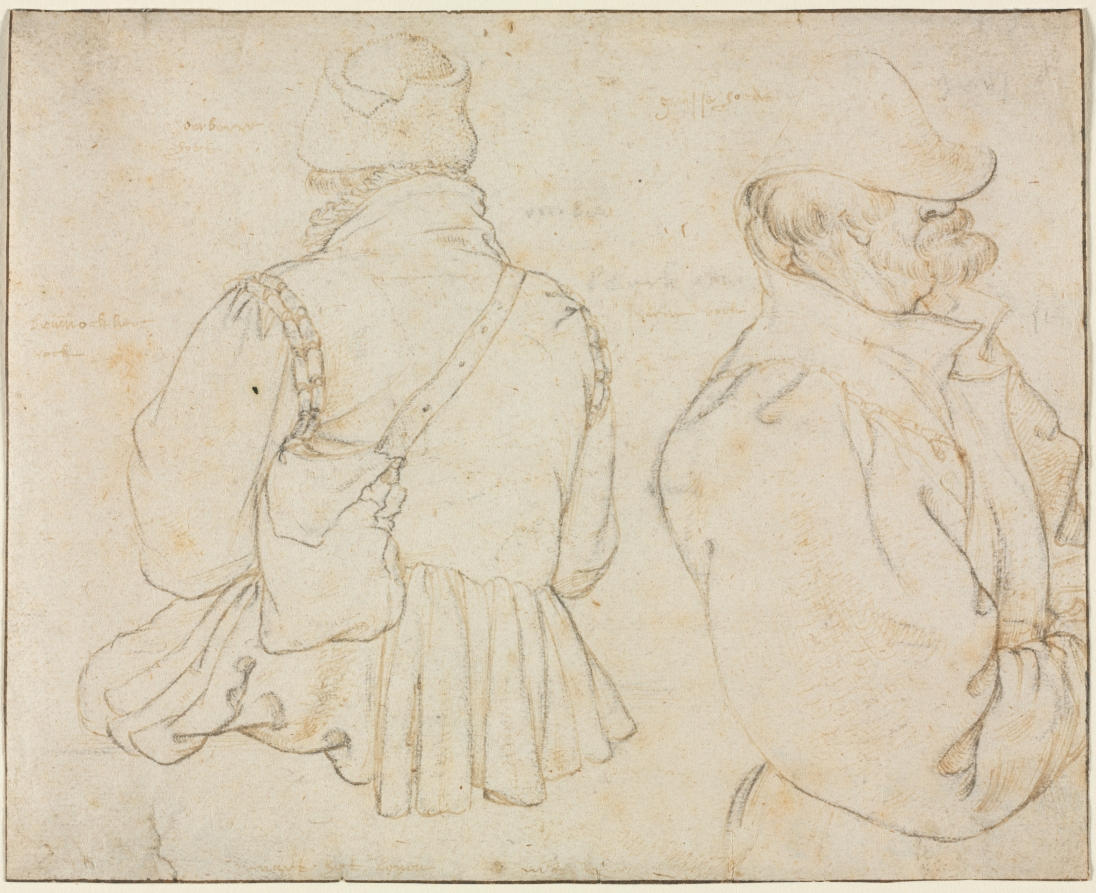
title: Two Bohemian Peasants in Half-Length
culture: Flanders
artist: Roelant Savery (Flemish, 1576–1639)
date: c. 1600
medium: Pen and light- and dark-brown inks over preliminary drawing in black chalk; framing lines in pen and brown ink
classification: Drawing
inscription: by artist, upper left, in brown ink: omberne / hoet ; by artist, upper right, in brown ink: gr[y?]sse hoed [=gray hat]; by artist, upper center, in black chalk: [illegible] ; by artist, upper center, in black chalk: [illegible] ; by artist, left center, in brown ink: [brúinockker?] rock [=brown-ochre mantel]; by artist, center, in brown ink: zwartter rock [=black mantel]; by artist, lower left, in brown ink: [nart?] het leuen [=taken from life]; VERSO, lower left, in blue pencil: WCA805 / WCA803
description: These three drawings, which depict seated peasants at a market in the city and a team of horses led by a herder on horseback, are part of a group of approximately 80 observational drawings by Savery. His farmers, market vendors, and other everyday people are never posed and rarely glance at the viewer. Savery marked each drawing with detailed instructions regarding the colors to be used later and the words naer het leven (from the life). The works were made in Prague when Savery was employed at the court of the great patron and art collector Emperor Rudolf II, demonstrating that interest in peasant life extended even to the highest echelons of society.